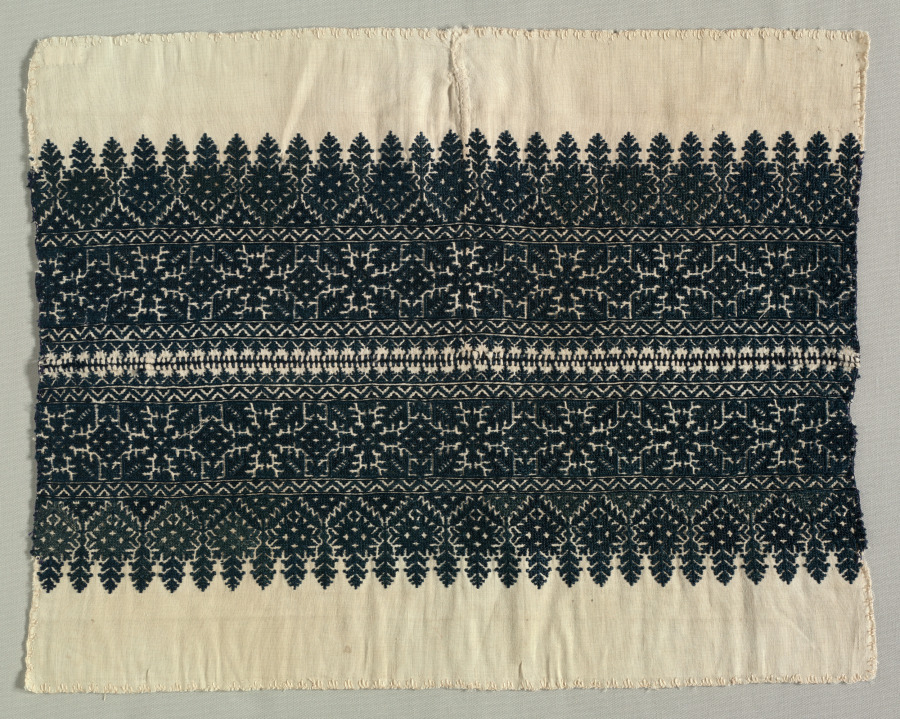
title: Fragment of a furnishing textile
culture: Africa, North Africa, Morocco, Fes, Moroccan embroiderer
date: early 1900s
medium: Cotton, silk, dye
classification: Embroidery